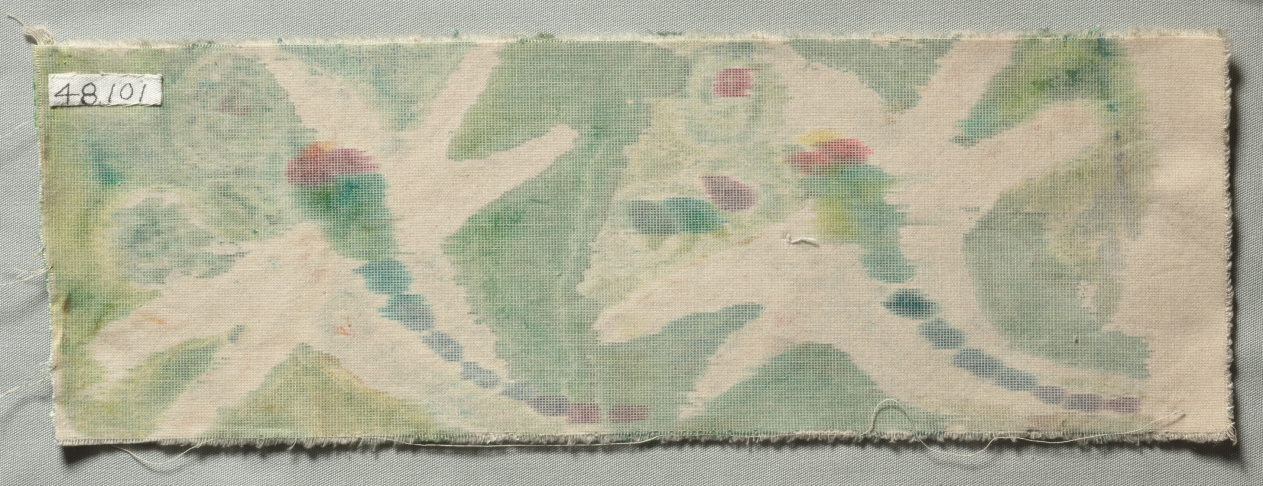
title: Stenciled Velvet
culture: America, New York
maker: Tiffany Studios (United States, New York, 1902–32)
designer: Dorothy Marshall Hornblower (American, 1886–1968)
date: c. 1902–10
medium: plain silk velvet stencilled with vegetable dyes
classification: Velvet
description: Textiles formed a large part of Louis Comfort Tiffany's artistic production, especially since he used many of them in his designs for artistic interiors. His clients included many society notables, institutions, churches, and even the White House. Tiffany employed many women artisans in his business, including Dorothy Marshall Hornblower, who oversaw the textile department and likely designed this ethereal Art Nouveau pattern.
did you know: This dragonfly design for a stenciled velvet fabric was likely used for drapery material.